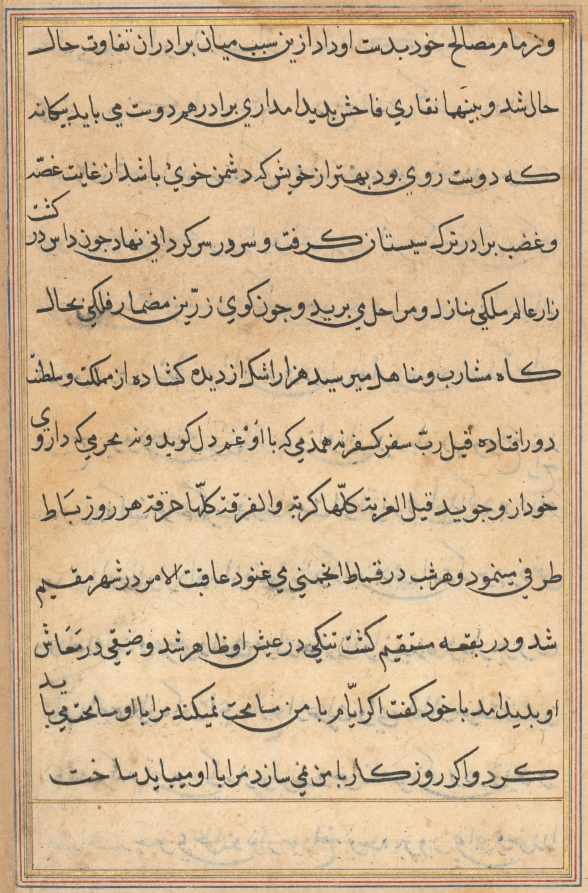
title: Page from Tales of a Parrot (Tuti-nama): text page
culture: Mughal India, court of Akbar (reigned 1556–1605)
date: c. 1560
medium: gum tempera, ink, and gold on paper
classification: Painting